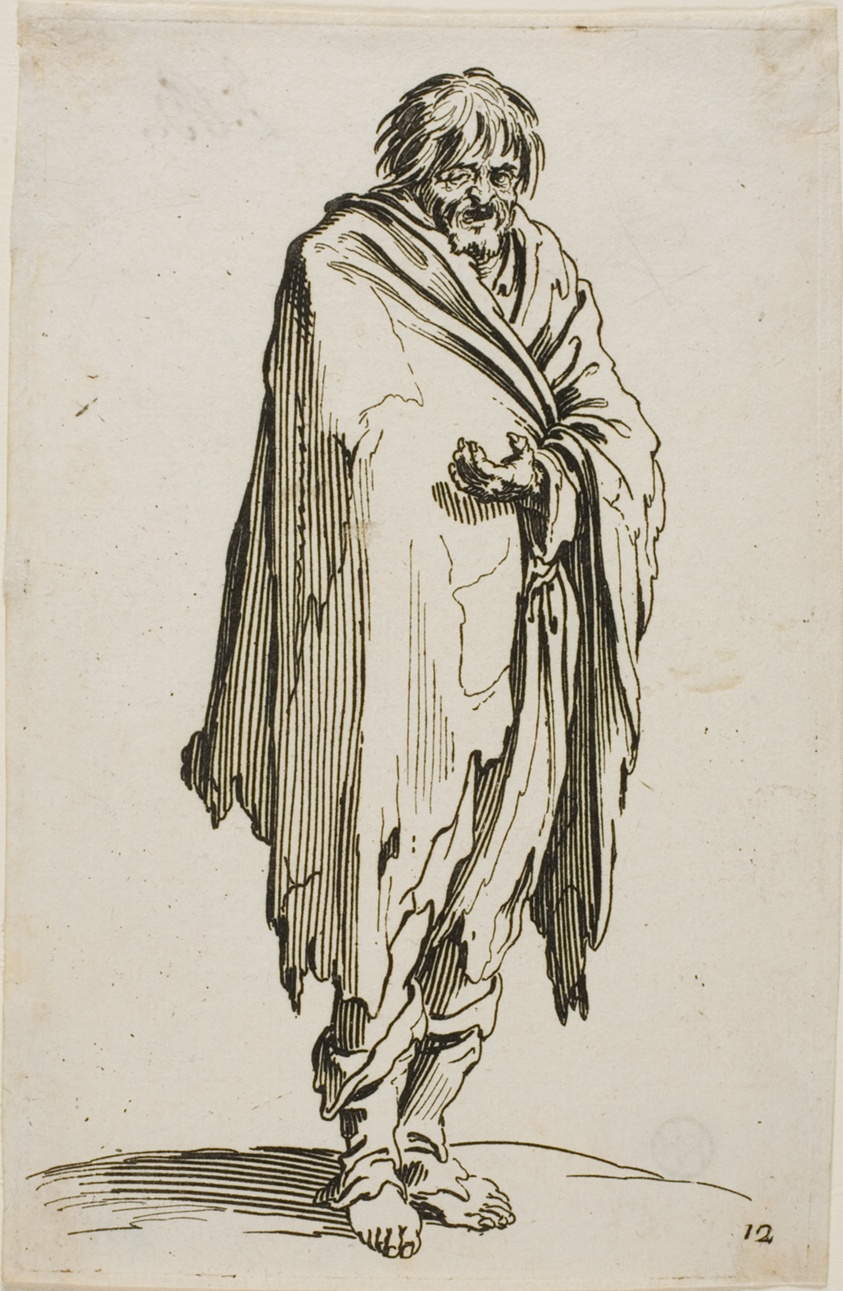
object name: Print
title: Beggar without Hat or Shoes, plate twelve from The Beggars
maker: Jacques Callot (French, 1592-1635)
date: c. 1622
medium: Etching on ivory laid paper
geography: France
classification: etching; print; prints and drawing